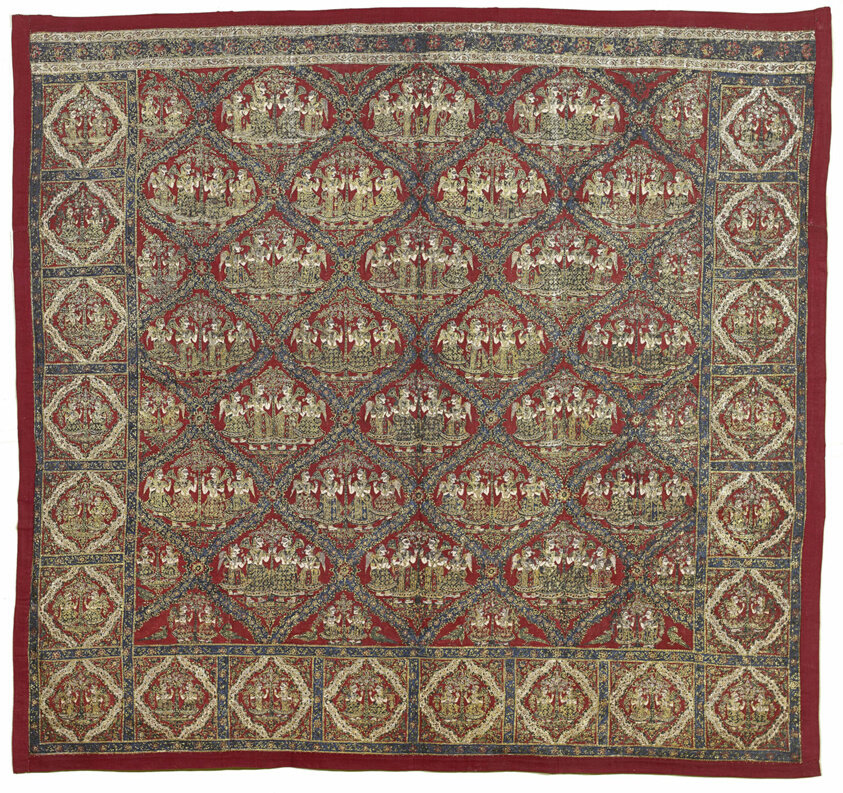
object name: Textile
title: Pichvai with Ladies under the Tree Motif (Vrikshachari)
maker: India; Telangana, Hyderabad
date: c. 1820-1830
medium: Cotton, painted, mordant-dyed, wax resisted, with gold and mica gilding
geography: Southern India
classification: textile; cotton; asian art